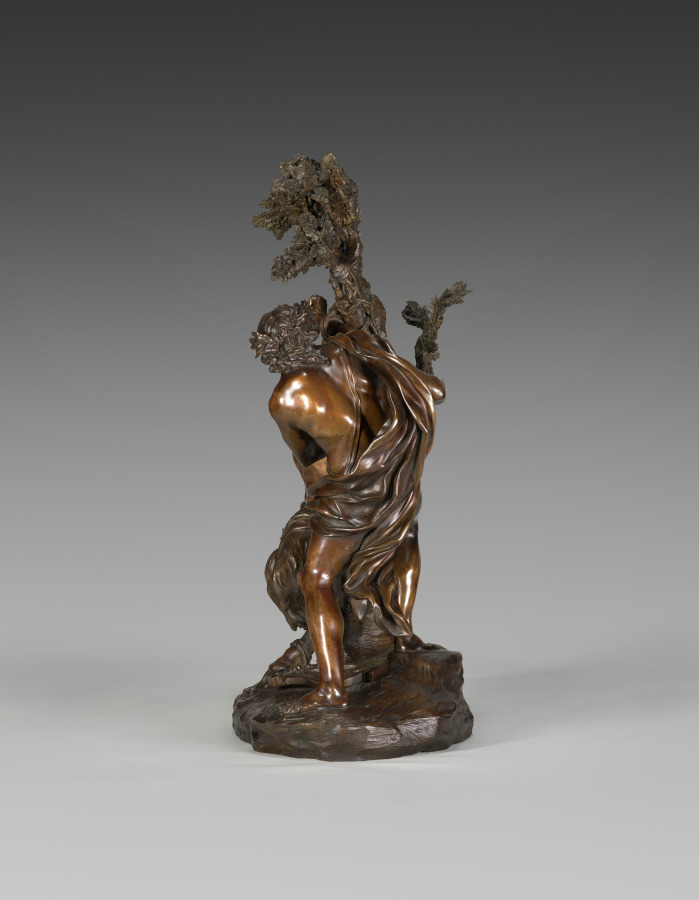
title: Apollo Flaying Marsyas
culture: Italy, Florence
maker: Giovanni Battista Foggini (Italian, 1652–1725)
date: c. 1691–1700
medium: Bronze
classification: Sculpture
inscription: 1136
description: According to myth, the overconfident satyr (half-goat, half-man) Marsyas challenged Apollo, god of the arts, to a musical duel. The defeated Marsyas was tied to a tree and skinned alive in punishment for his pride. Foggini’s bronze captures the moment after Apollo’s victory as the bound Marsyas cries out in agony while the god makes the first incision. The satyr’s anguish is echoed by the gnarled branches; Apollo’s wrath is manifested in his billowing drapery.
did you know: The lyre with which Apollo outperformed Marsyas can be seen between his feet, cast down upon his victory.